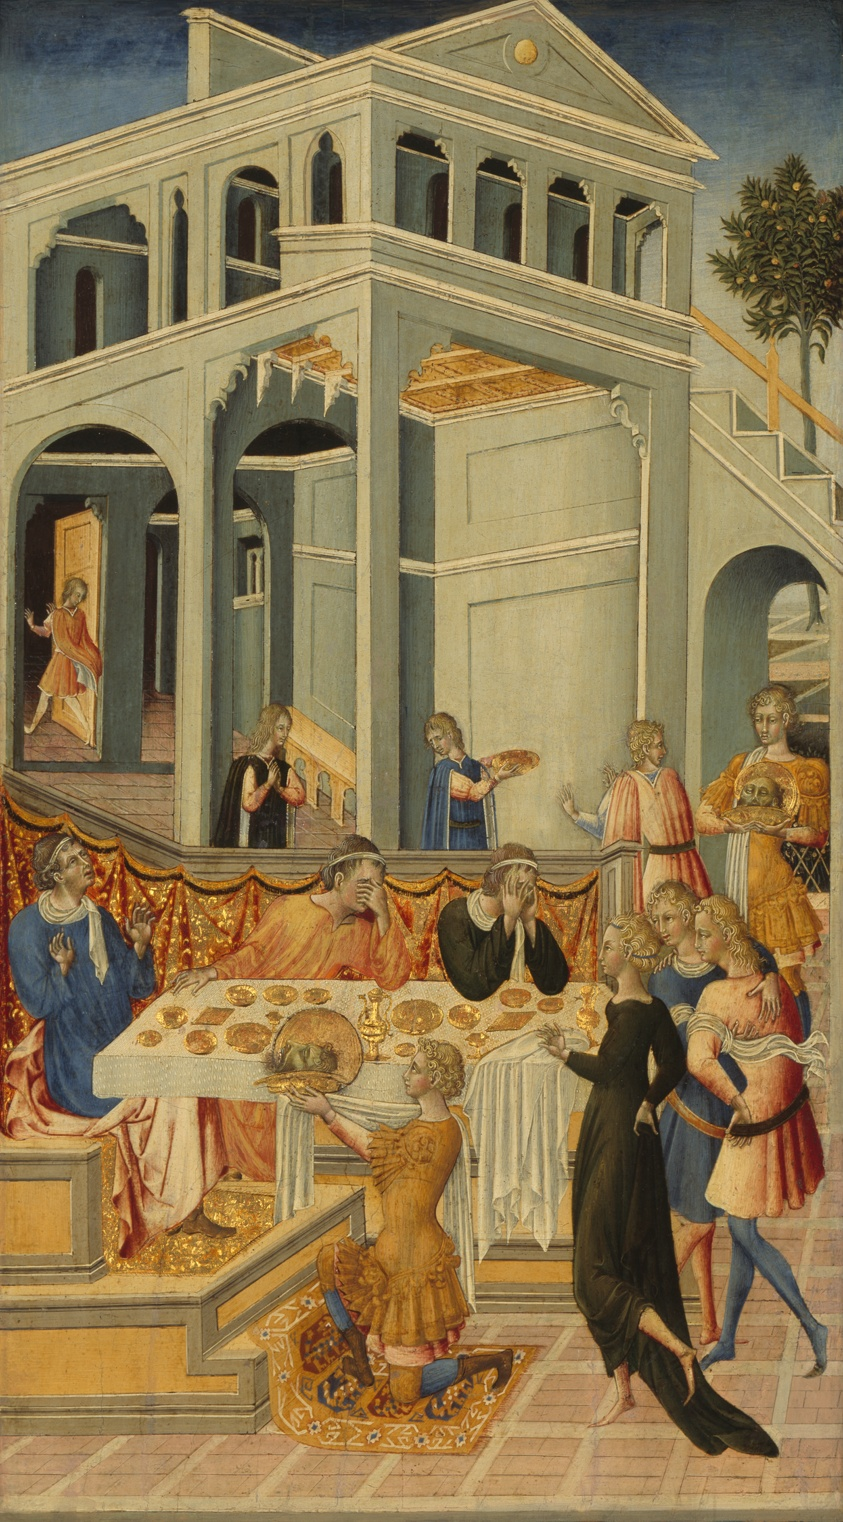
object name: Painting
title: The Head of Saint John the Baptist Brought before Herod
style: Renaissance, 15th century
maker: Giovanni di Paolo (Italian, 1398–1482)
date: c. 1455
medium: Tempera on panel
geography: Italy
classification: tempera; Italian; paint; painting; european painting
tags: Saint John the Baptist, biblical, Christian subjects, Christianity, Devotion, Italy, religious, religious figures, religious scenes, saints, castles, table, servingware, gold (color), palace, wealth, luxury, king, Salome, nobility, death, head, religion, Century of Progress, world's fairs, Chicago World's Fairs